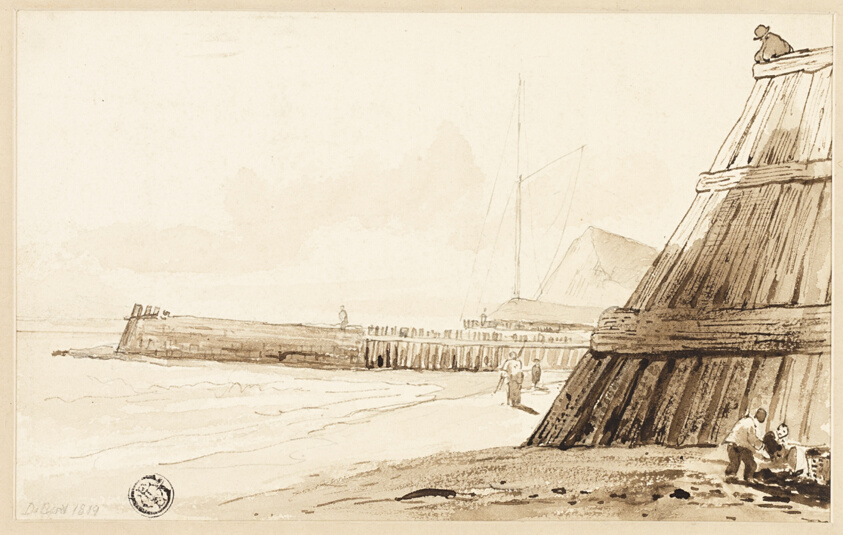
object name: Drawing and Watercolor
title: Stockade along Shore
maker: Unknown Artist; Flemish or French, 19th century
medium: Brush and brown wash over graphite, on ivory wove paper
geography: Flanders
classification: pen and ink drawings; drawings (visual works); prints and drawing